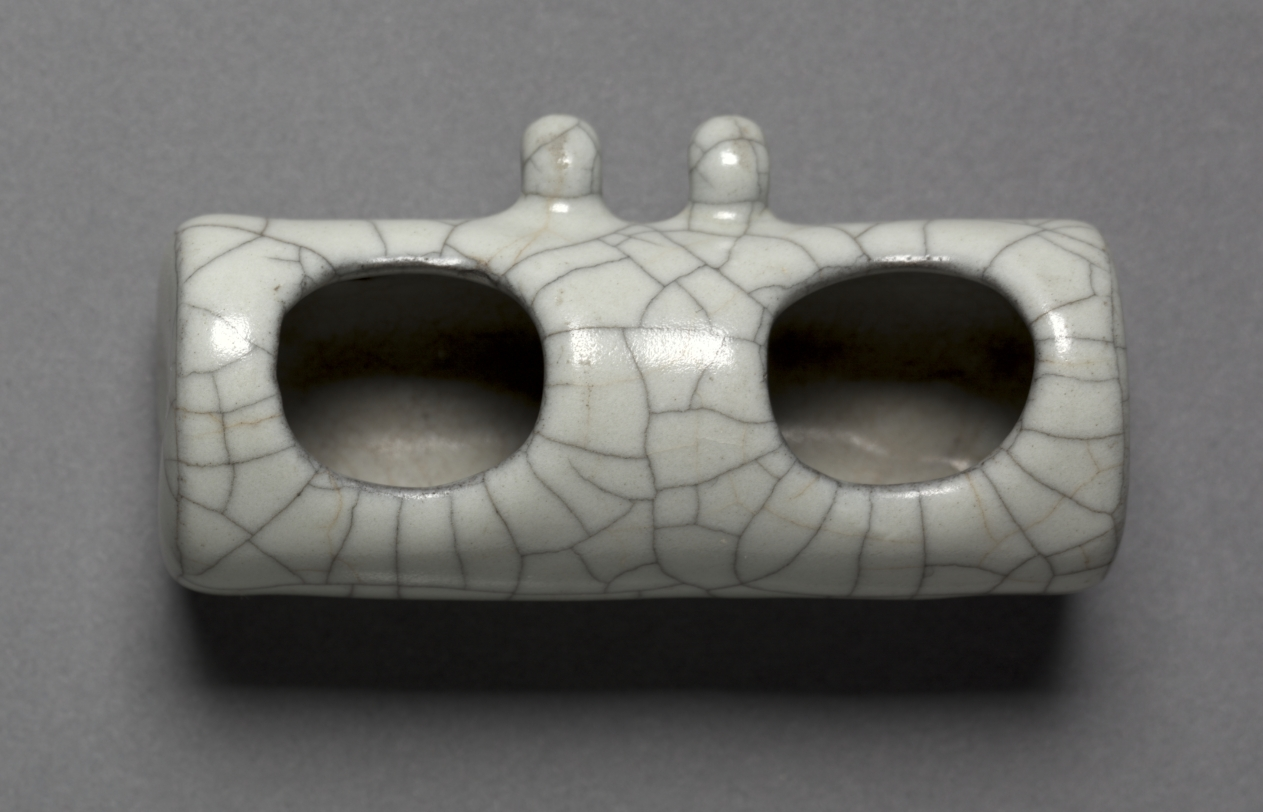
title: Bird feeder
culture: China, Song dynasty (960-1279)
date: 960–1279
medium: Glazed reddish-brown stoneware, Guan ware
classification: Ceramic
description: Walking small birds in bamboo cages furnished with precious porcelain feeders is a traditional leisure time pursuit of elderly men in China.